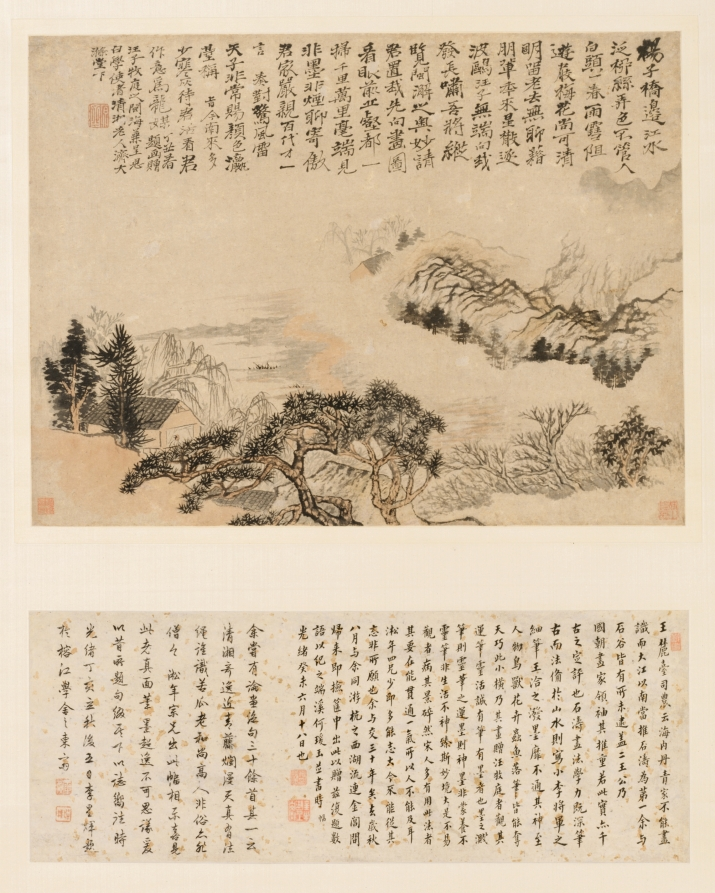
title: Spring Mist over Jiangnan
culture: China, Qing dynasty (1644-1911)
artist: Shitao (Chinese, 1642–1707)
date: 1697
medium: Hanging scroll; ink and light color on paper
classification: Painting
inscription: 揚子橋邊江水泛，柳絲弄色不管人白頭。/ 一春雨雪阻遊屐，梅花尚可清明留。/ 老去無聊藉朋輩，年來星散隨波鷗。/ 汪子無端向我發長嘯，吾將縱覧閩澥之奧妙。/ 請君置我先向畫圖看，眼前丘壑都一掃。/ 千里萬里毫端見，非墨非煙聊寄傲。/ 君家嚴親百代才，一言奏對驚風雷。/ 天子非常賜顏色，灜台稱旨今南來。/ 多少寒灰待君活，看君作意為龍媒。 丁丑春題畫，贈汪子牧庭之閩海。兼呈思白學使。清湘老人濟大滌堂下。[印]原濟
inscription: 2 colophons and 7 additional seals: 1 colophon and 4 seals of He Yuanyu 何瑗玉 (1840-?); 1 colophon and 2 seals of Li Xinhui (19th-20th c.); 1 seal unidentified.